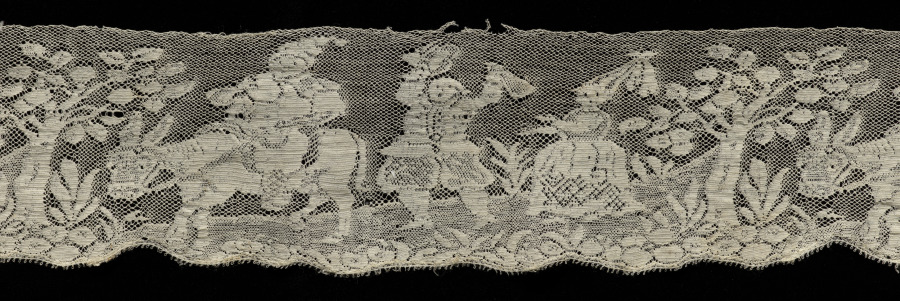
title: Lace Edging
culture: England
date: 1800–1840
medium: Machine-made lace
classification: Lace